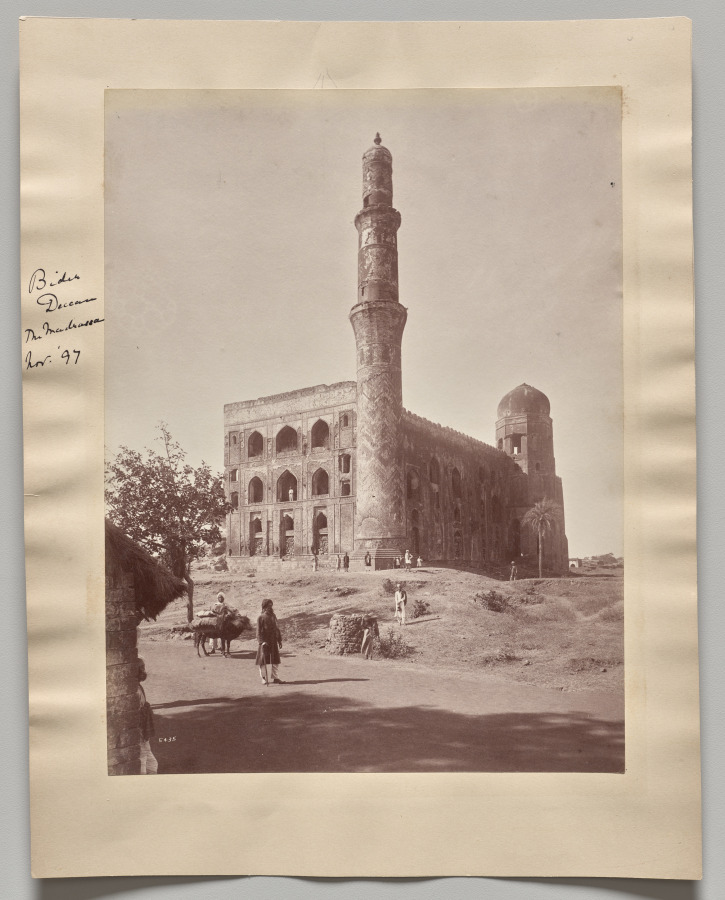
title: Mahmud Gawan Madrasa, Bidar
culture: India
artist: Raja Deen Dayal (Indian, 1844–1905)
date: c. 1890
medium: albumen print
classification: Photograph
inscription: Inscription lower left: "5435"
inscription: inscription along left edge of support: "Bidar Deccan the Madrassa Nov. ’97"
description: The architectural decoration on the tower echoes patterns on Bidri ware (see 2020.206), ornamented metallic vessels cast from condensed vapors of zinc in a technique native to that city. This image is notable for the precision and poetry with which the people are posed. Most gaze at the camera, probably instructed to do so by Deen Dayal; this is rarely the case in images by foreign photographers.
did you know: Built in 1472 as an Islamic theological college, in 1656 gunpowder stored in it ignited and gutted the building.